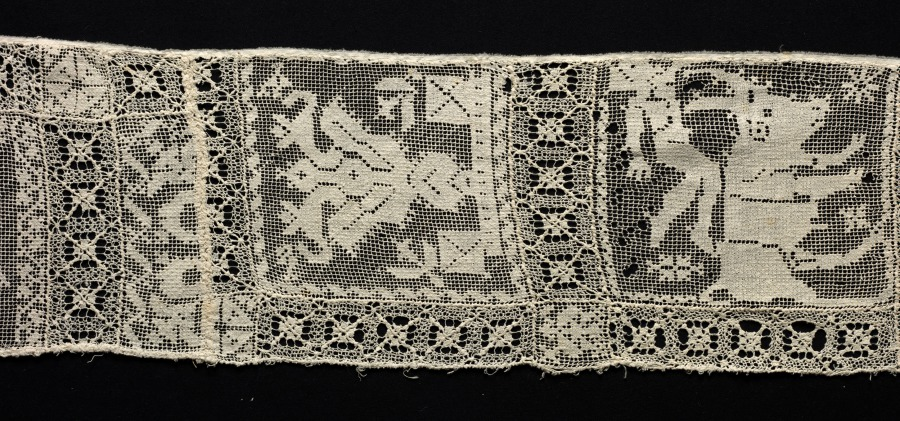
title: Band with Various Fantastic Creatures and Vegetal Patterns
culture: Italy, 1800s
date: 1800s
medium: Bleached linen (est.): needle lace, filet/lacis (knotted ground and darned in two directions)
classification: Lace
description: The reversed and backward orientation of many of the squares in this band of lace suggests that this was not their original layout. They were most likely taken apart and later joined back together in a disoriented manner.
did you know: The square showing a man in midair above a bull-like creature is reminiscent of the Minoan "Bull Leaping" fresco at the Knossos palace complex.